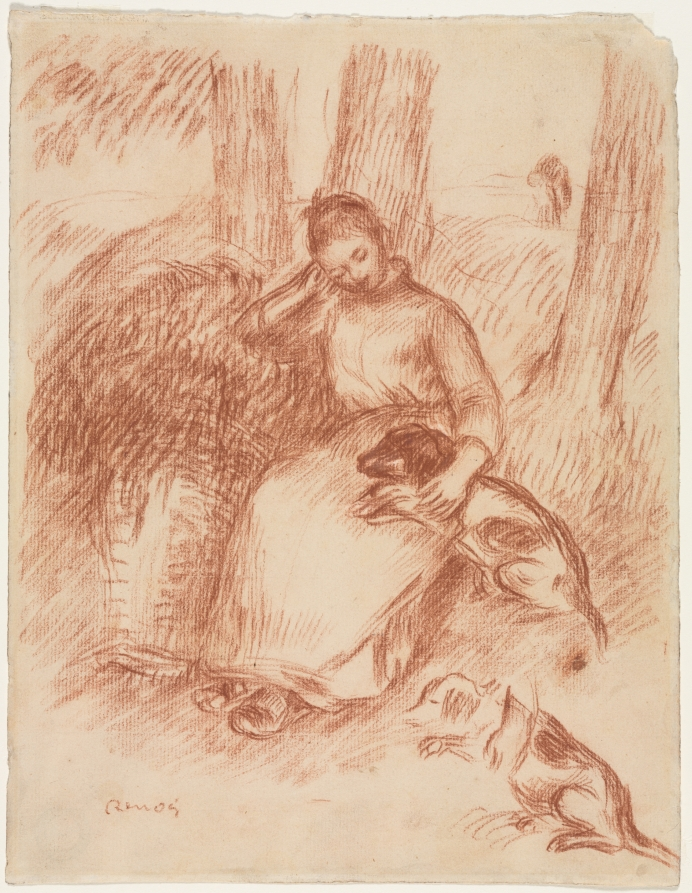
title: Peasant Girl with Dog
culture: France, 19th century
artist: Pierre-Auguste Renoir (French, 1841–1919)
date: c. 1894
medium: red chalk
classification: Drawing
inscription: signed, lower left, in red chalk: Renoir ; verso, upper left, in graphite: 8 ; upper left, in graphite: 41 x 50 ; lower left, on paper strip mounted to sheet, in graphite: 77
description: During the last decades of his career, Renoir worked prolifically in red chalk, which was used to develop a loose and sketchy style. In this drawing, the artist attempted to recapture the spontaneity that characterized Impressionist art a few decades earlier. By showing a young girl seated resting peacefully alongside a bale of hay, he idealized rural French life.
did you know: The art historian John Rewald supposedly called this work "one of the two or three most beautiful Renoir drawings in America."